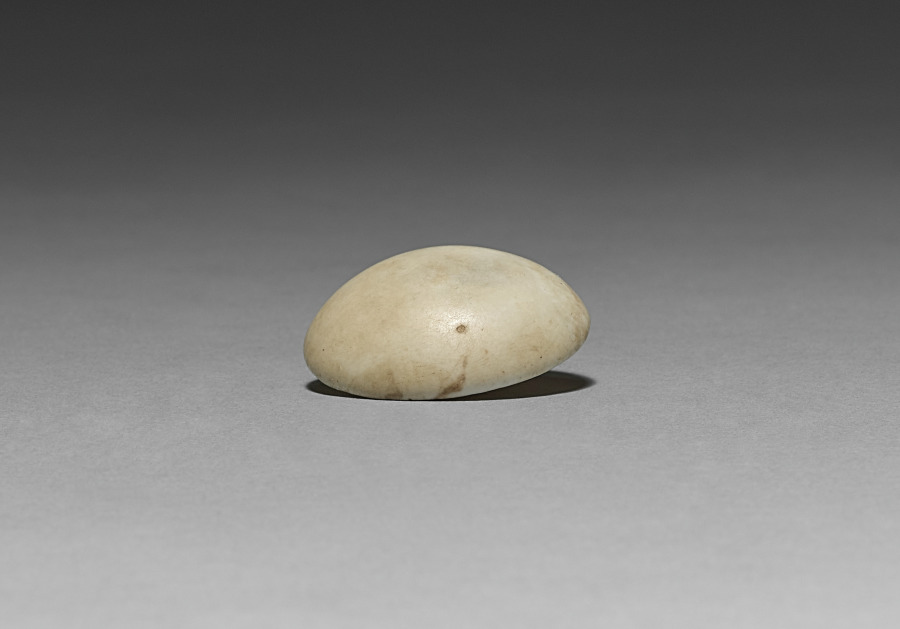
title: Ear Stud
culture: Egypt, New Kingdom (1540–1069 BCE), Dynasty 18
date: 1540–1296 BCE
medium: travertine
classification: Jewelry